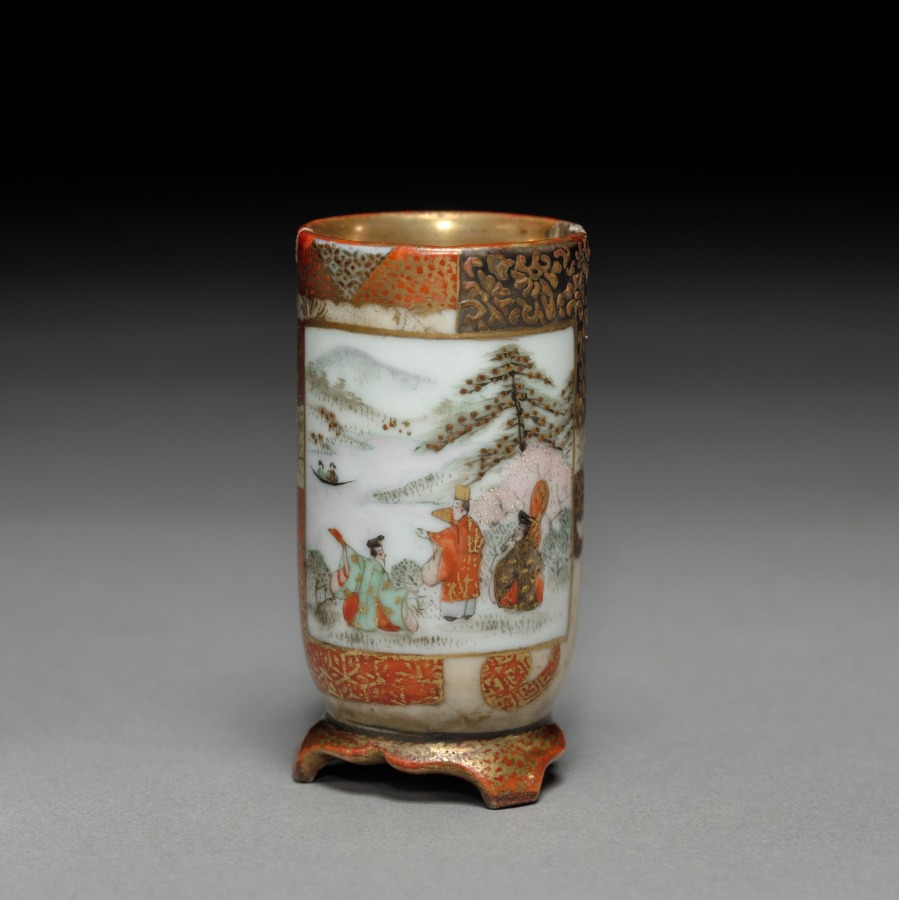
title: Miniature Vase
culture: Japan, Edo period (1615–1868) to Meiji period (1868–1912)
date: 1800s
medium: overglaze porcelain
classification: Ceramic